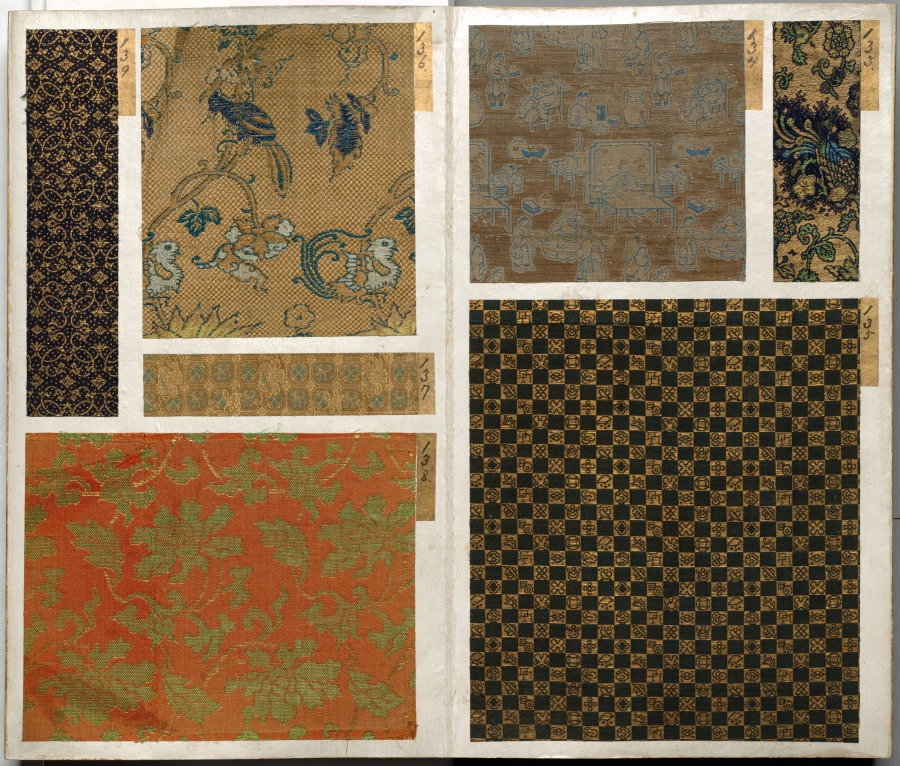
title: Album of Textile Samples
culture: Japan, Edo period (1615–1868)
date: 1600s-1700s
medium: silk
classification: Textile